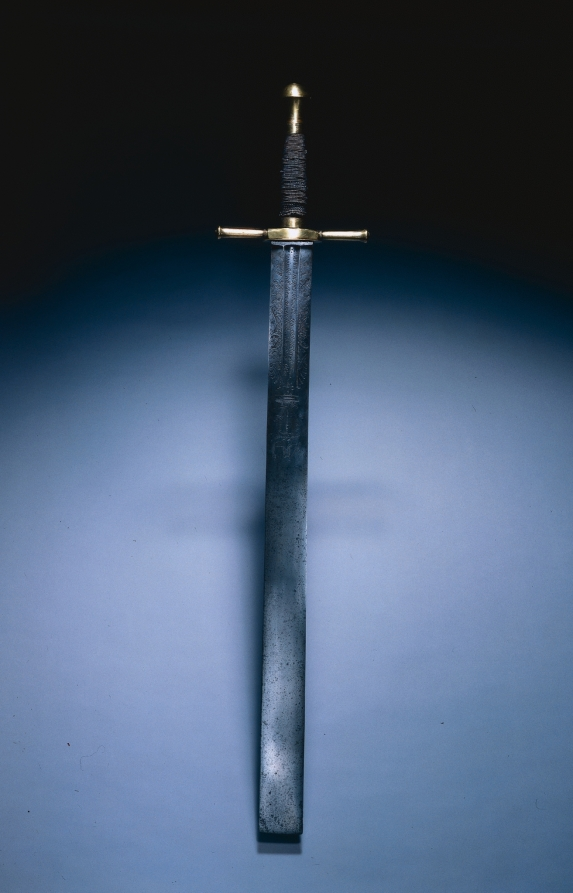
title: Executioner's Sword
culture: Germany, late 17th Century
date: late 1600s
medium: steel, wood, brass and copper wire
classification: Arms and Armor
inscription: Wan ich Das Schwerdt thu auff heben so / Wunch ich Dem armen sunder das Ewege Leben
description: Execution by decapitation was generally reserved for the nobility during the Middle Ages and Renaissance. Although the axe was favored in England, for centuries swords were used throughout Central Europe. The blades were often etched with moralizing inscriptions and designs representing Justice (as here), the gallows, the rack, or the Crucifixion. By the early 1700s swords were no longer primarily used in Europe for executions, but they still functioned as symbols of power. This sword was probably ceremonial for a formal procedure or procession.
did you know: The inscription on this sword reads, "When I raise this sword, so I wish that this poor sinner will receive eternal life."